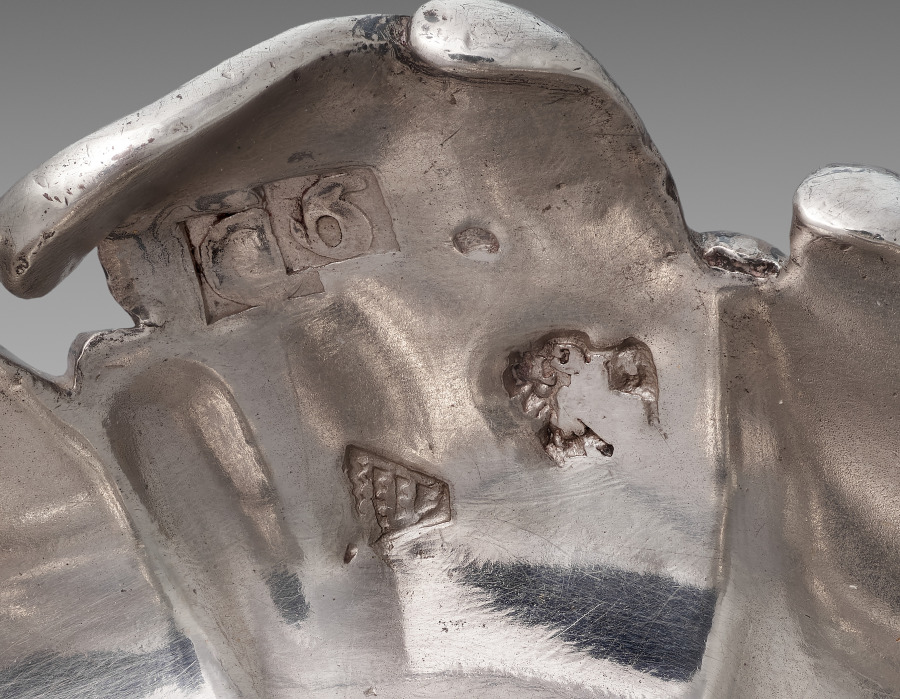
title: Candelabrum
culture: France, Paris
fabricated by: François Thomas Germain (French, 1726–1791)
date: 1757–1758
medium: silver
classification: Silver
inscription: [Maker’s mark of Francois-Thomas Germain, beneath base]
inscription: [Charge mark of Eloy Brichard, 1756−1762, beneath base]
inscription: [Warden's mark For Paris, 1757−1758, beneath base]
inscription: [Discharge mark for work intended for export, 1756−1775, beneath base]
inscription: [Discharge mark for work intended for export, 1756−1775, on base]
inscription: [Hallmarks for Saint Petersburg, on base]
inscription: [Assay mark of Ivan Frolov, on base]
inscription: [Russian standard of the French silver, on base]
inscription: [Maker’s mark of Francois-Thomas Germain, master silversmith on October 16, 1748, beneath drip pan of each three bobeches]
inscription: [Charge Mark Of Eloy Brichard, 1756−1762, beneath drip pan of each three bobeches]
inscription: [Discharge mark for work intended for export, probably 1733−1775, beneath drip pan of each three bobeches]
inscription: [Warden's mark for Paris, 1757-1758, beneath drip pan of each three bobeches]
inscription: [Russian standard of the French silver, beneath drip pan of one of three bobeches]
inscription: [Assay mark of Ivan Frolov, beneath drip pan of one of three bobeches]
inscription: [Charge mark for large work of Eloy Brichard, 1756−1762, on bayonet attachment of candelabra]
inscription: [Warden's mark for Paris, 1757-1758, on bayonet attachment of candelabra]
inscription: [Illegible mark in a square, on one bobeche]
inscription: [Engraved beneath base]: “Fait. Par. F. T. Germain. Sculp[teu]r. Orf[ev]re. Du Roy. Aux. Galleries. Du Louvre. A Paris- 1758”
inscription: [Engraved beneath base]: "Du no. 31"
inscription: [Beneath base]:"No 463"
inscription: [Russian Imperial Coat-of-arms, engraved beneath base]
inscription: [Modern inscription with black ink, beneath base]: "L5 ... 51/w-8"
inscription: [Modern inscription (illegible) in a rectangular paper label on the base, engraved. Cipher composed with two “M”’s (?) surmounted by a royal crown]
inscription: [Engraved on candelabra bayonet attachment]: "No 463"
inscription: [On candelabra bayonet attachment]: "du No 31"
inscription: [Engraved cipher with two "M"s (?) surmounted by a royal crown, on one bobeche]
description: This candelabrum is part of a pair. Its design blurs the line between function and decoration. The arms twist and curve, visually flower stems while physically supporting the candles. Though this visual unity is typical of the rococo style, the influence of the rising neoclassical style is evident in the allegorical scenes of light that decorate each candelabra’s stem.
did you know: These candelabra are part of a dinner service sent from Paris, France to Saint-Petersburg, Russia in two separate shipments, the first of which contained 270 objects for 8 dozen place settings.